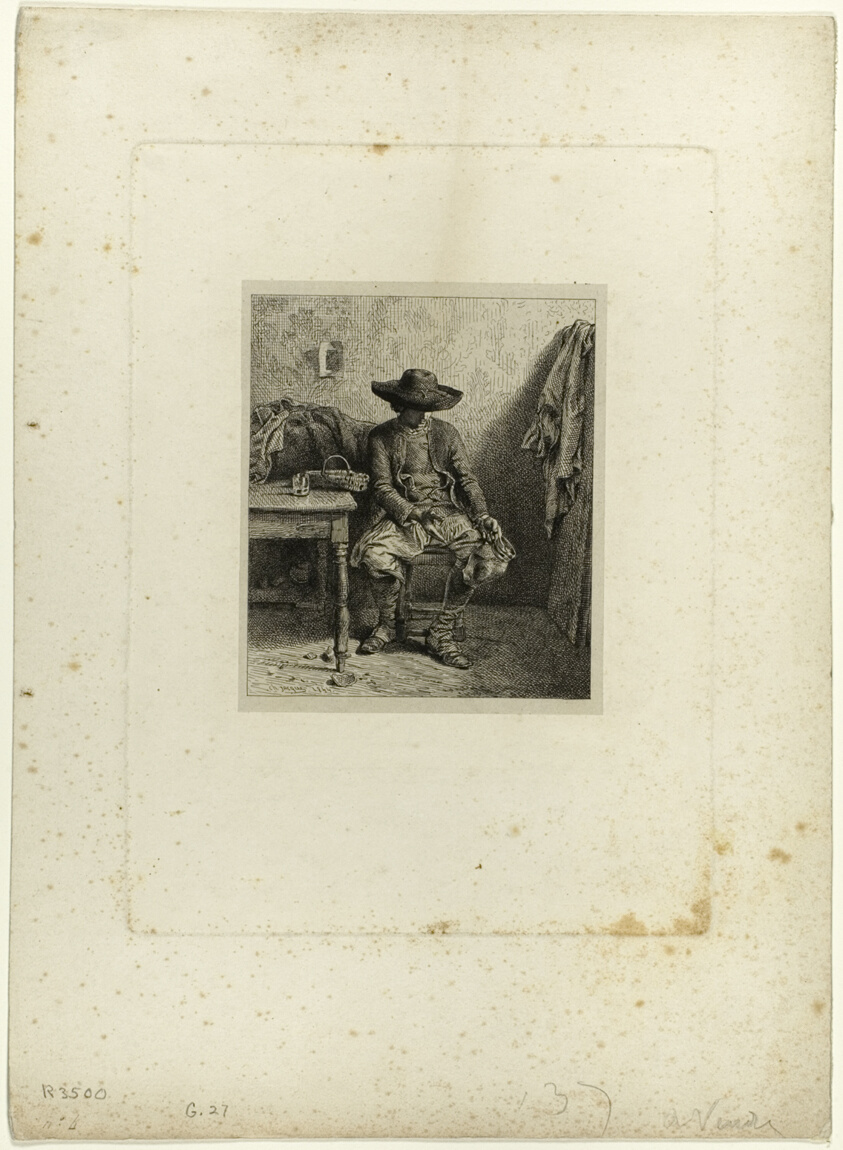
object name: Print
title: The Broken Crock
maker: Charles Émile Jacque (French, 1813-1894)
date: 1844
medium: Etching on light gray China paper laid down on ivory wove paper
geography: France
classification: etching; print; prints and drawing